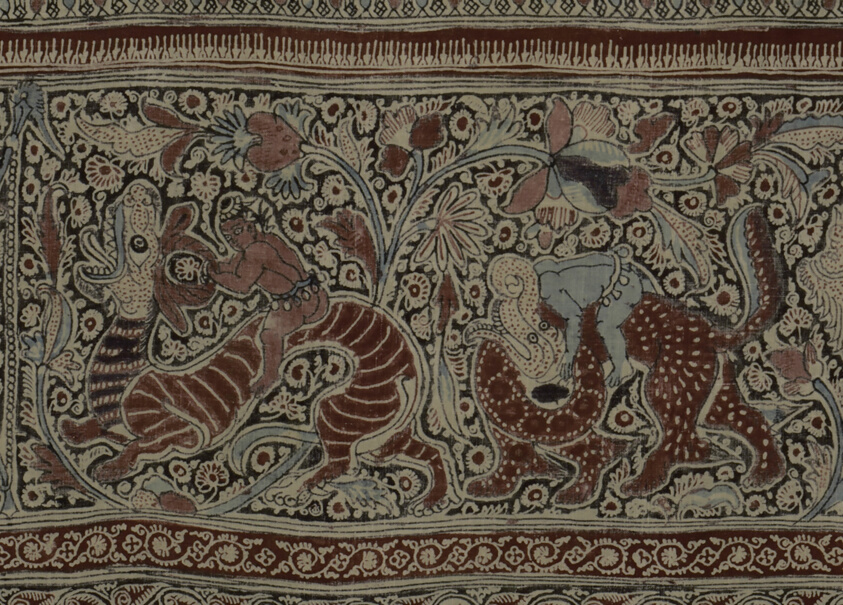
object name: Textile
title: Painted cotton with medallion and figures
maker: Deccan, India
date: 15th century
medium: cotton, plain weave; painted mordant; resist-dyed; painted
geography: India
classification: textile; weaving - printed